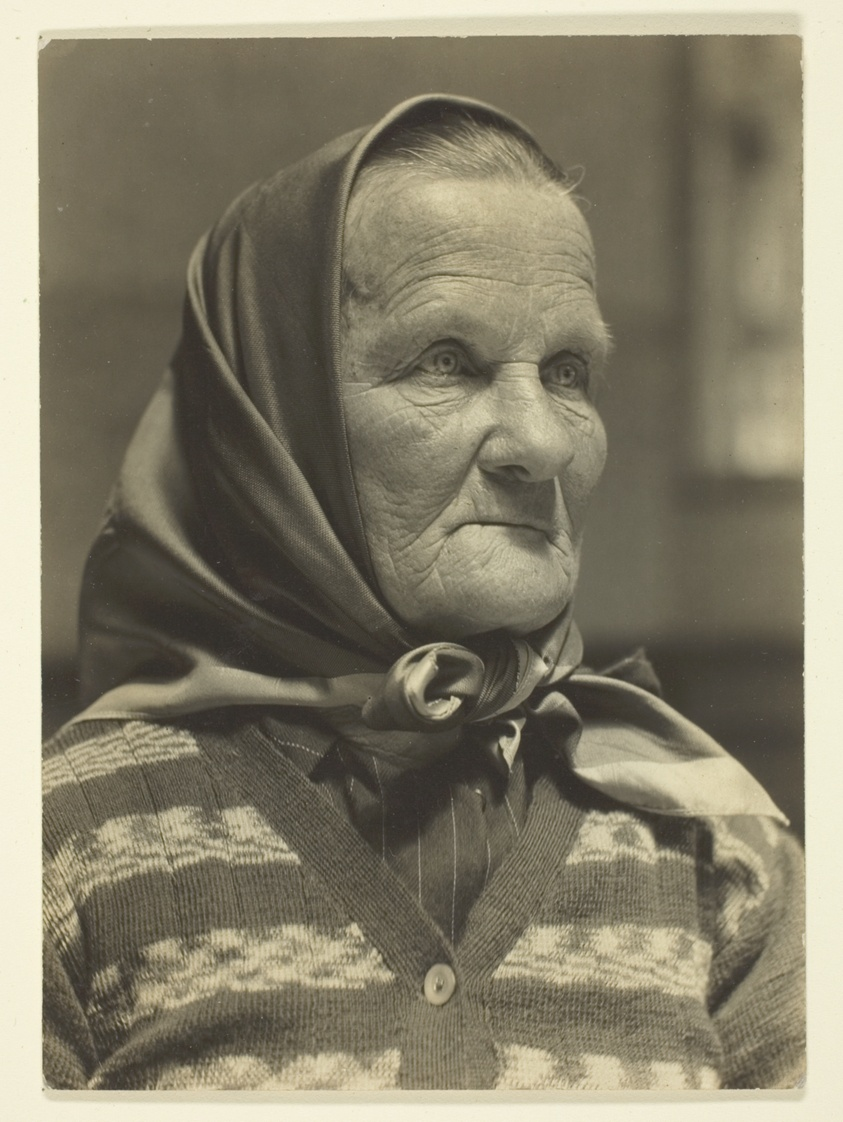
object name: Photograph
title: Czech Grandmother, Ellis Island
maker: Lewis Wickes Hine (American, 1874–1940)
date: 1926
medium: Gelatin silver print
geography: United States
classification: gelatin silver (developing-out-paper) pr; photographic process; photography; photograph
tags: Collected by Hugh Edwards, documentary